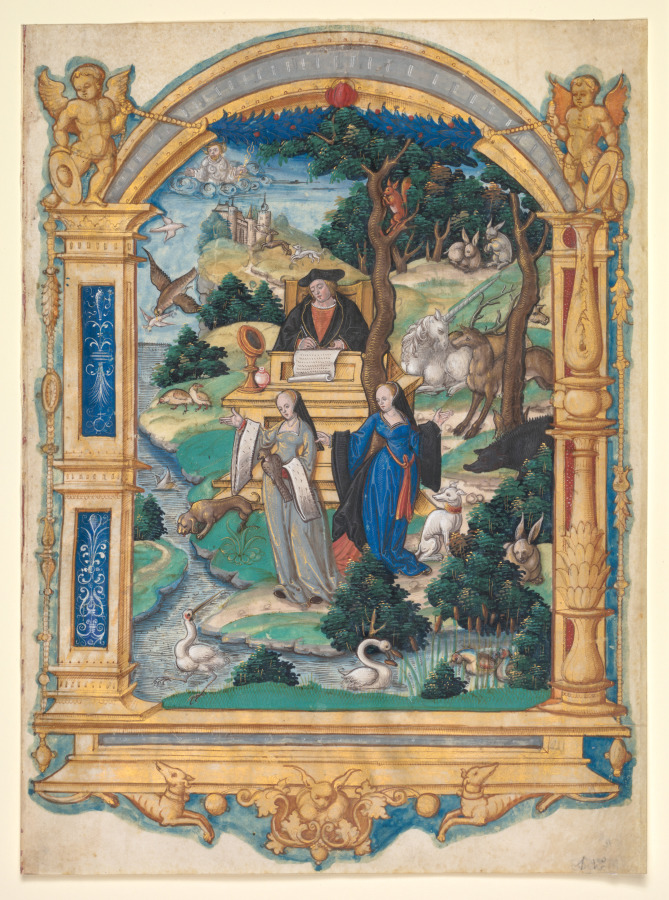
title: Frontispiece Miniature from the Manuscript of a Poem by Guillaume Crétin: Debate Between Two Women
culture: France, Paris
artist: Master of Francis I (French)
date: c. 1537–1540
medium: ink, tempera, and liquid gold on vellum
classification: Manuscript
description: This leaf is one of four surviving miniatures from the only known illuminated manuscript of the poem Débat entre deux dames sur le passetemps des chiens et oyseaux by Guillaume Crétin. The poem takes the form of a debate between two women, represented here, who argue at length as to the relative merits of hunting with falcons versus hunting with dogs. The volume was likely made as a presentation copy or gift for King Francis I (1515-1547). This artist is known to have painted many miniatures for the king as well as for other members of the court during the 1530s.